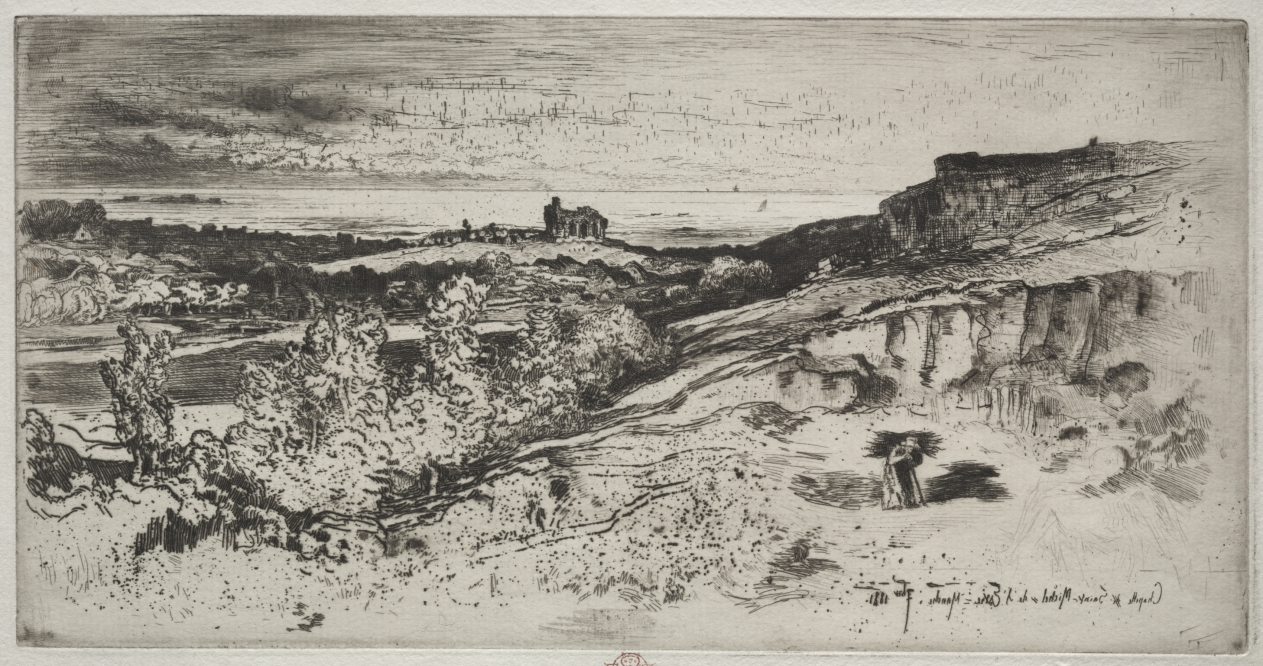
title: The Chapel Saint-Michel at l'Estre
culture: France, 19th century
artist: Félix Hilaire Buhot (French, 1847–1898)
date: 1881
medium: etching, drypoint and roulette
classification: Print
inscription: in graphite, lower right: epreuve d'artiste/ Felix Buhot; signed, titled and dated in plate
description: After inking the plate, instead of wiping all of the excess ink off of the surface, Buhot purposely left a thin layer of ink on the sky and water, creating an effect of atmosphere and mist.